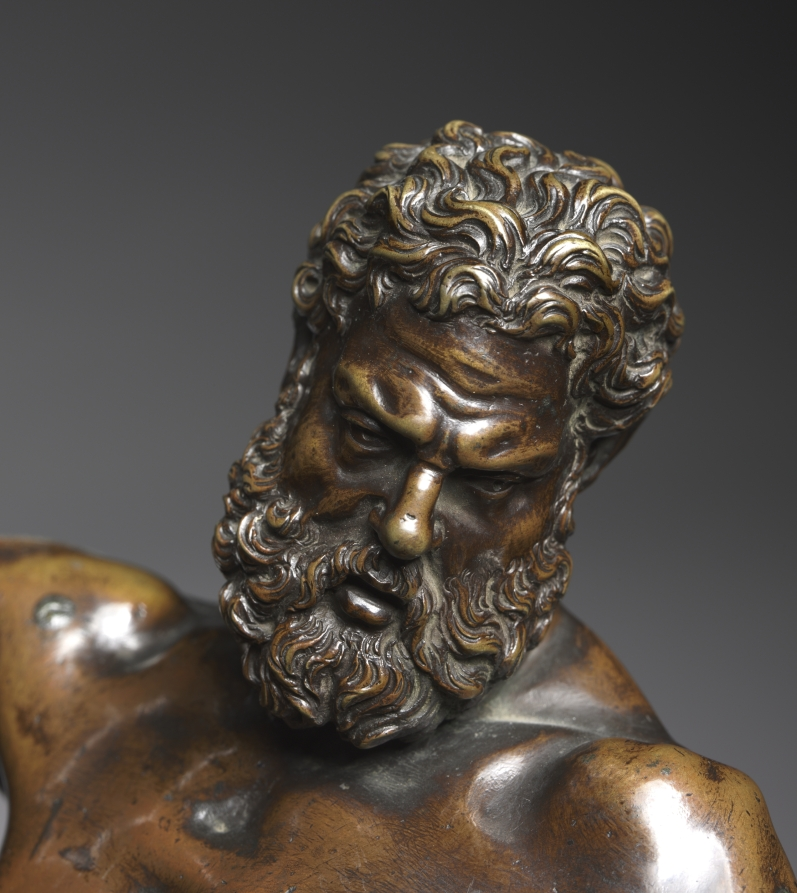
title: Hercules and the Hydra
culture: Northern Europe, late 16th-early 17th century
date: late 1500s-early 1600s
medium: bronze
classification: Sculpture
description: Hercules slayed the Lernean Hydra as the second of the ancient hero’s twelve labors. When one of the nine snake-like heads was destroyed, two grew back. Hercules cauterized each stump, allowing him eventually to kill the monster. The object he holds may have been a club, sword, sickle, or torch. The sinuous, scaly Hydra and the defined musculature presented challenging opportunities for sculptors working in bronze. The raw, tumultuous energy and twisting form-associated with artists of the late 1500s-contrasts to Jacopo Sansovino’s earlier Virgin and Child (1951.316).